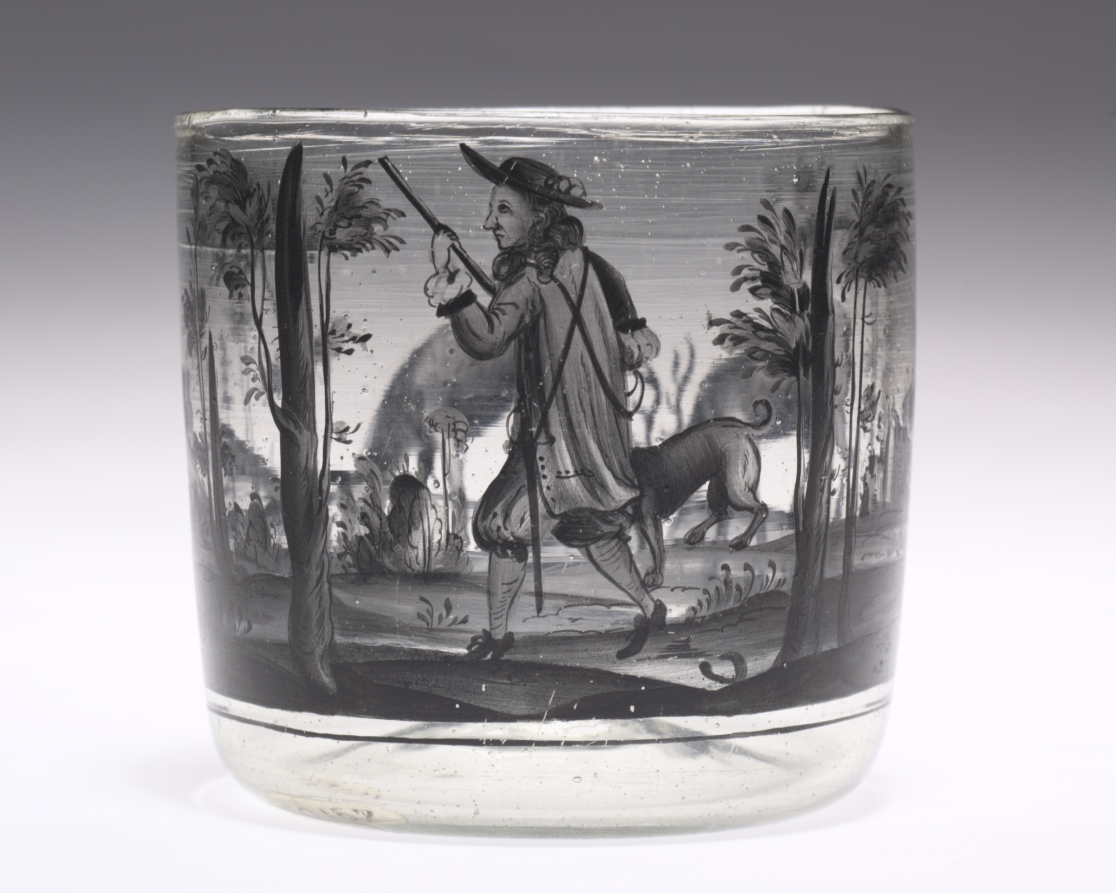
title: Bowl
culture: Germany, mid-17th century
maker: attributed to Johann Schaper (German, 1635–1670)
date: c. 1665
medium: Wheel engraved glass; enamel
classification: Glass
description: Johann Schaper (1621-1670) was a German painter of stained glass, mainly working in Nuremberg and Regensberg, who later turned to decorating glass and ceramics from his home, which was typical of artisans in the 17th century (hausmaler). His style was mainly a linear one in the manner of engravings, and often he worked in black (schwarzlot) or dark colors. Schaper was so influential that other artisans tried to copy his technique, in which he scratched out details with a needle, with varying degrees of success.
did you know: The fine details of the decoration were achieved by scratching away the enamel with a needle.